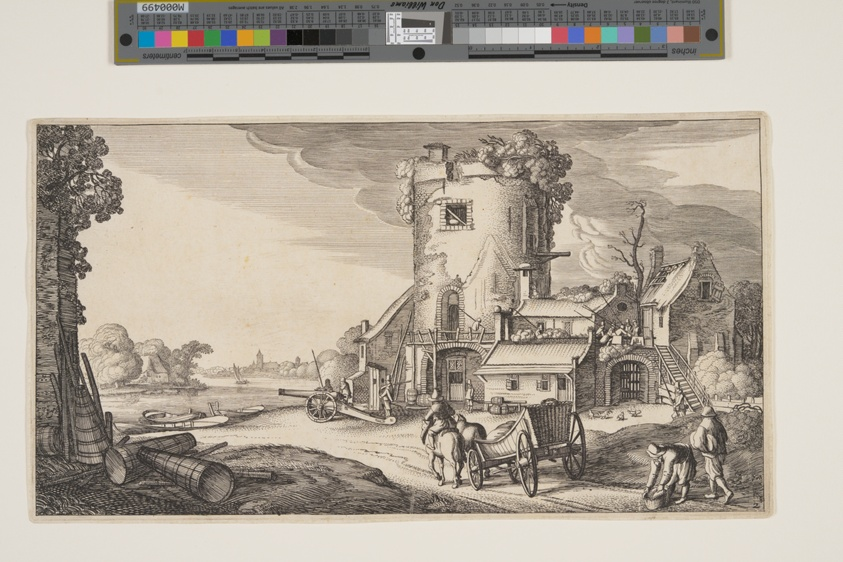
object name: Print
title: Watch-Tower Near a River, from Landscapes (Playsante Lantschappen)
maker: Attributed to Claes Jansz. Visscher II (Dutch, 1586-1652); after Jan van de Velde II (Dutch, c. 1593-1641)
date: c. 1641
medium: Etching, with engraving, on ivory laid paper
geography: Netherlands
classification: etching; paper; print; prints and drawing